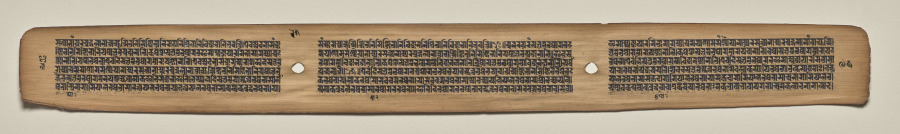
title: Text, Folio 95 (verso), from a Manuscript of the Perfection of Wisdom in Eight Thousand Lines (Ashtasahasrika Prajnaparamita-sutra)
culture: Eastern India, Bihar, Vikramashila Monastery. Painting: Nepal, Kathmandu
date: Sunday, September 14, 1119 (year 239 of the Newar Samvat in the month of Ashvina)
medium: gum tempera and ink on palm leaves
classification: Painting